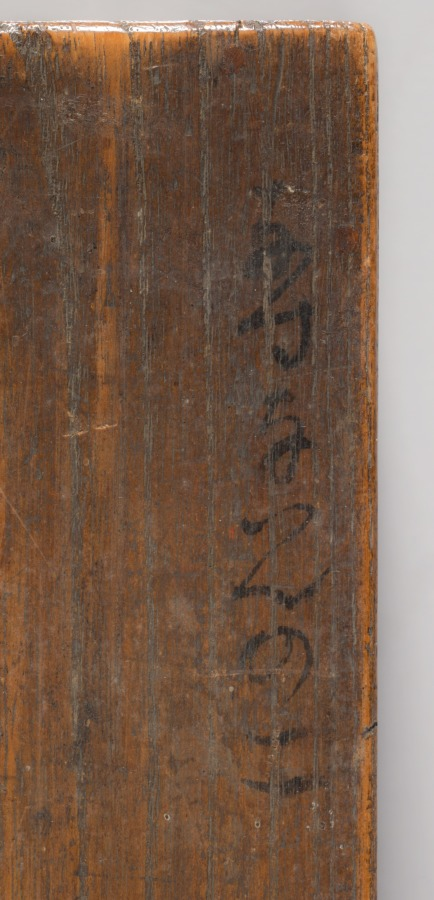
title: Puppy with Dandelions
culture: Japan, Edo period (1615–1868)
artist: studio of Tawaraya Sōtatsu (Japanese, c. 1570–c. 1640)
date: 1600–1640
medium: hanging scroll; ink on paper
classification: Painting